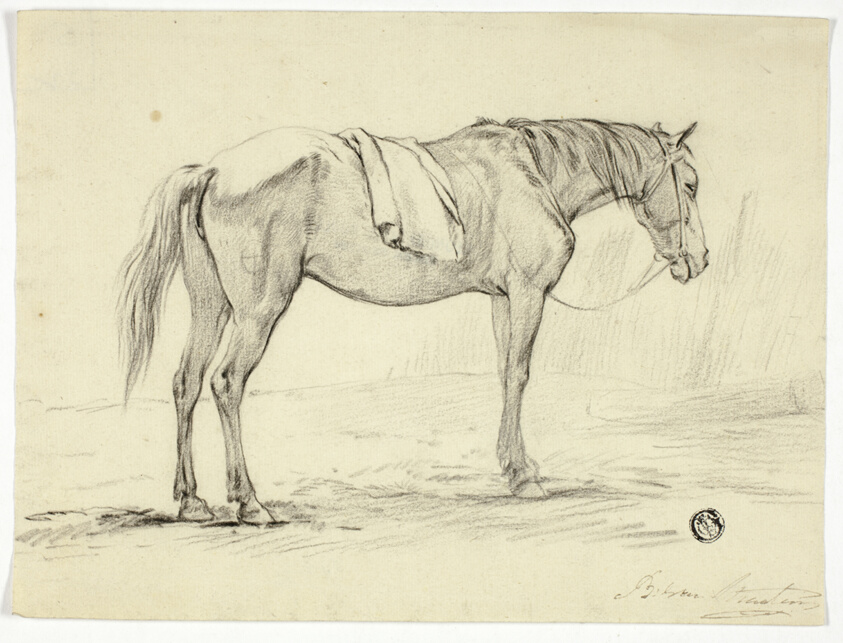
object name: Drawing and Watercolor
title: Standing Horse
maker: Unknown artist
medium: Charcoal on cream laid paper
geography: Unknown Place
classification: chalk; drawings (visual works); prints and drawing